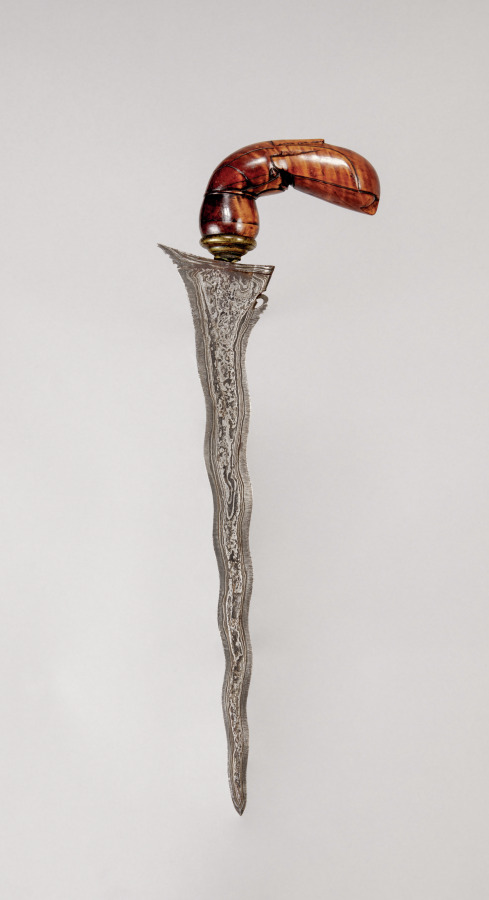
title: Sword (Kris)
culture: Java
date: 1800s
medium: iron with wooden handle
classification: Arms and Armor